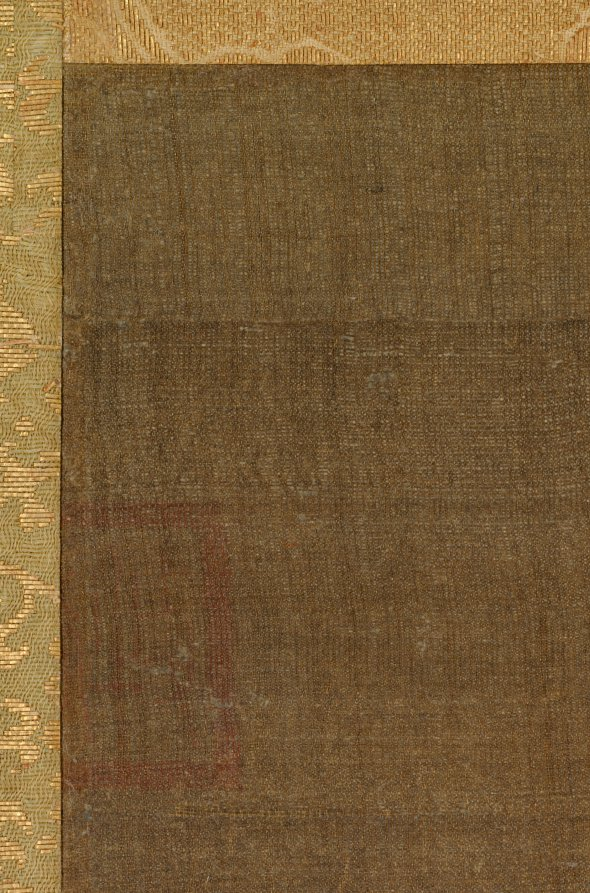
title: Tiger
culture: China, Southern Song dynasty (1127-1279)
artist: Fachang Muqi (Chinese, 1220–1280)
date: c. 1250–79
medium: Hanging scroll; ink and slight color on silk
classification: Painting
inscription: 道有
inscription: 雜華室印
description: The dragon and tiger are tied to the philosophical concept of yin and yang, which describes opposite but complementary forces. The dragon occupies a tiered background of waves and mist. Its luminous head emerges from the darker passages, and its narrow twisting body is serpent-like. By contrast, the close-up view of the tiger emphasizes its bulk. The tiger bends its head to lick its paw while its tail curls in the foreground. In their original Chan Buddhist context, this pair of scrolls likely flanked a central image, like the Bodhisattva Guanyin. The silk has darkened over the centuries, and the slight reddish shading in the tiger’s tongue and nose has faded.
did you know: Fachang Muqi's ink paintings, like this pair, were highly appreciated and collected in Japan.